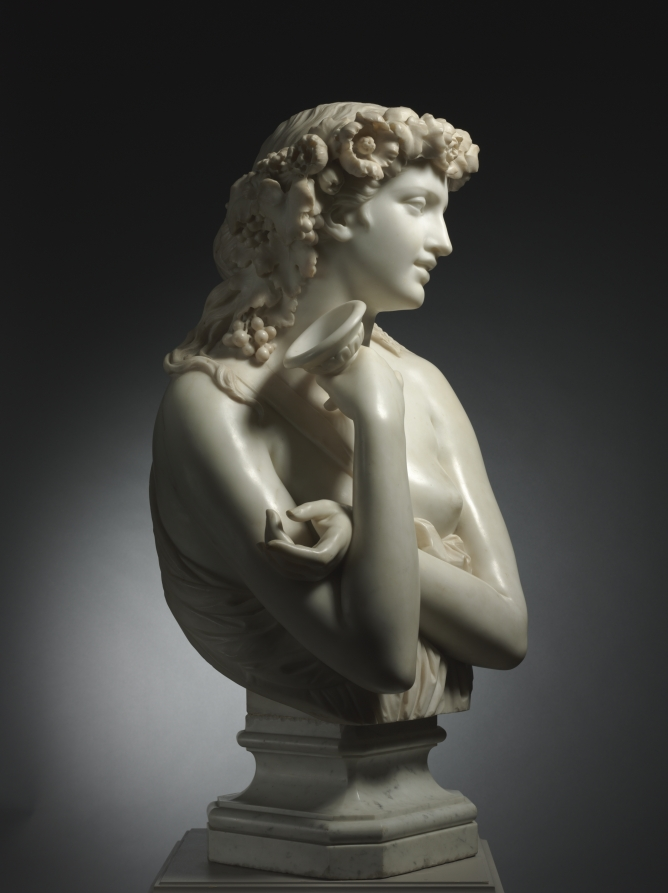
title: Bacchante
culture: France, 19th century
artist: Jean-Baptiste Clésinger (French, 1814–1883)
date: 1863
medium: marble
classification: Sculpture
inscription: signed below, on back of bust: J. Clésinger / Rome / 1836.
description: The French sculptor Auguste Clésinger spent much of his life in Rome, where this bust was created in 1863. He is particularly noted for the creation of sensual subjects in marble, such as this obviously inebriated Bacchante, a female companion of Bacchus, the Roman god of wine.